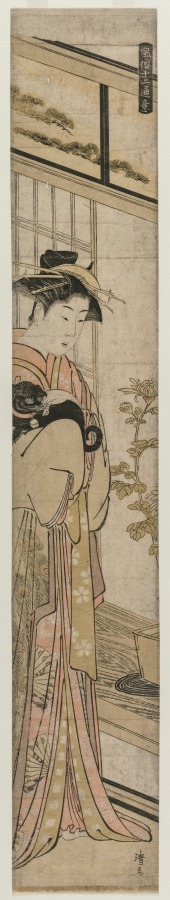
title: Courtesan Holding a Dog (from the series Popular Presentations)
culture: Japan, Edo period (1615–1868)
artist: Torii Kiyonaga (Japanese, 1752–1815)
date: 1783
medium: color woodblock print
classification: Print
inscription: Signature: Kiyonaga ga